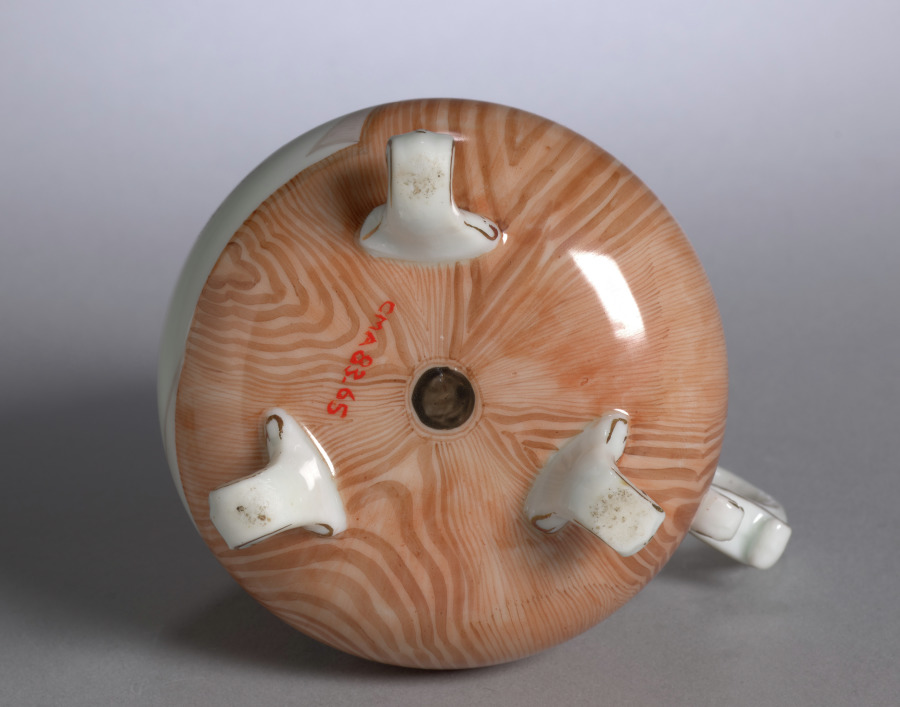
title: Covered Jug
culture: France, 18th century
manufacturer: Niderviller Factory (French)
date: c. 1780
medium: porcelain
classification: Ceramic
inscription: inscribed at lower right corner of trompe l'oeil print: Niderviller.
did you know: Cream jugs with lids or covers usually held warm cream for coffee or tea.